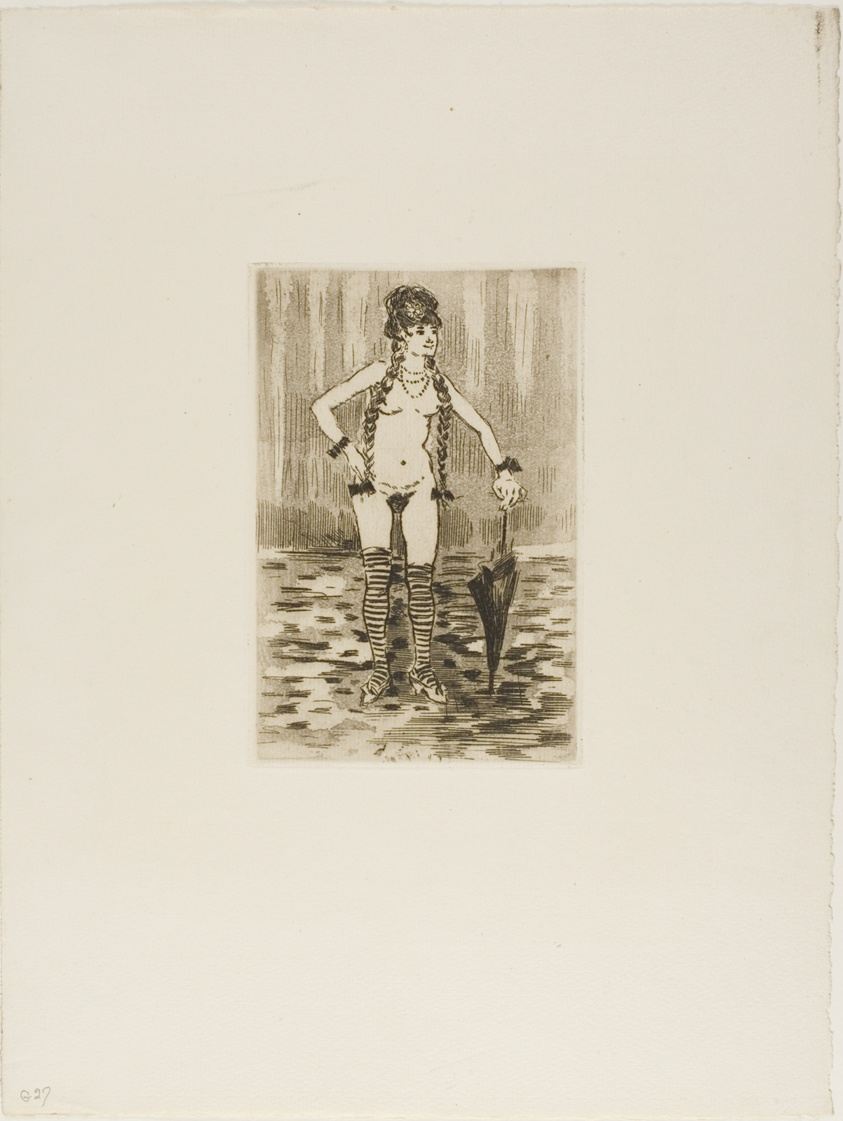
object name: Print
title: Rejected Frontispiece for Marthe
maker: Jean Louis Forain (French, 1852-1931)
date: 1879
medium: Etching and aquatint in black on ivory laid paper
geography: France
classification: etching; print; prints and drawing